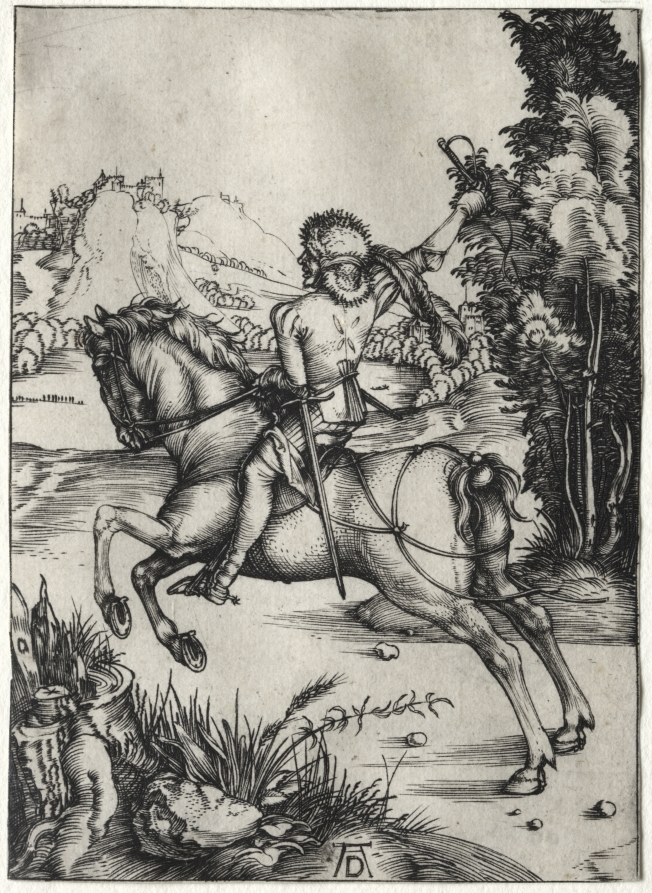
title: The Little Courier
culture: Germany, late 15th Century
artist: Albrecht Dürer (German, 1471–1528)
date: c. 1496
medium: engraving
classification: Print